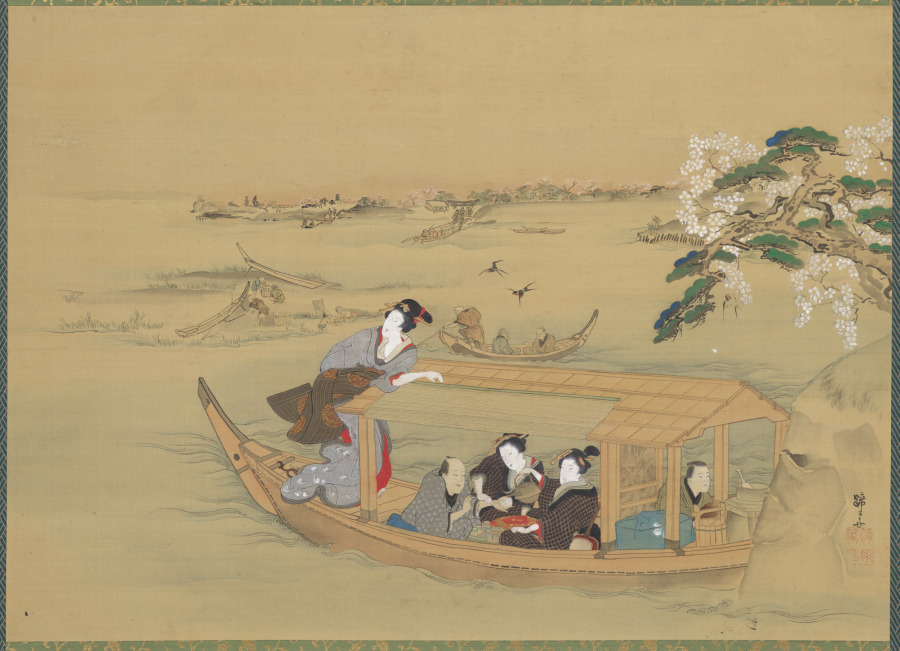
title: Pleasure Boat on the Sumida River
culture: Japan, Edo period (1615–1868)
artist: Teisai Hokuba (Japanese, 1771–1844)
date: 1800s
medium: Hanging scroll; ink and color on silk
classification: Painting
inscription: Signed: Teisai. Sealed: Teisai go [no] in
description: After a major fire in Edo (now Tokyo), the Yoshiwara licensed brothel district was relocated to an area accessed via boat along the Sumida River, giving rise to many compositions depicting travel there. Here, attendants with checkered robes serve refreshment to a client. A figure at the fore of the boat tends to the kitchen. A courtesan at the aft, or rear, surveys the river scene. Acquaintances converse in modest commuter boats, and fishers put in to a tiny island. The boat is near the entrance to the San’ya Canal, where pleasure-seekers would disembark.